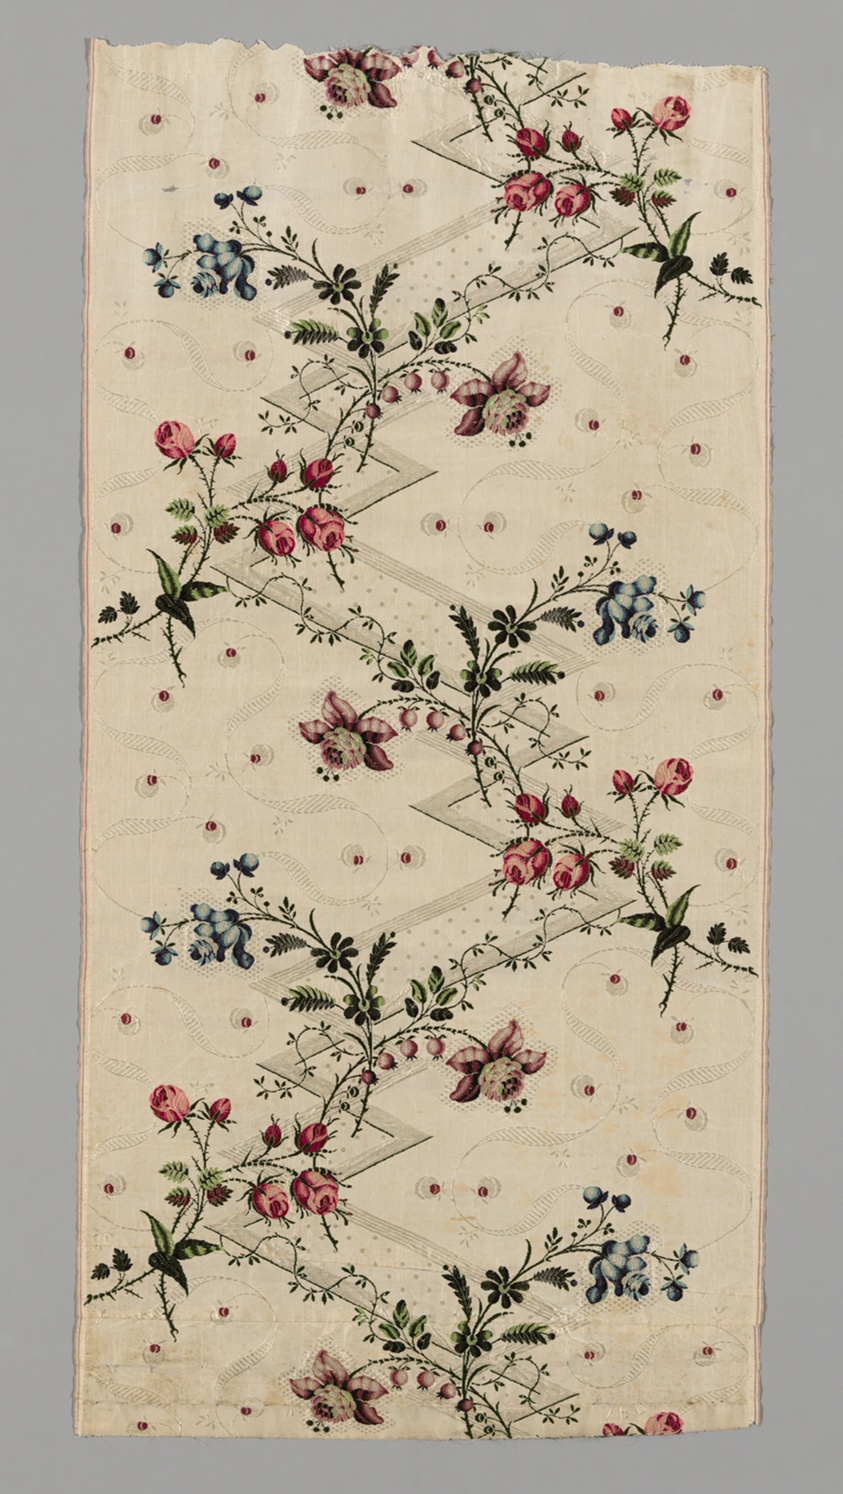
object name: Textile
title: Panel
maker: England, Spitalfields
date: 1750s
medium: Silk, plain weave with supplementary patterning and brocading wefts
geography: Spitalfields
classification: weaving; textile